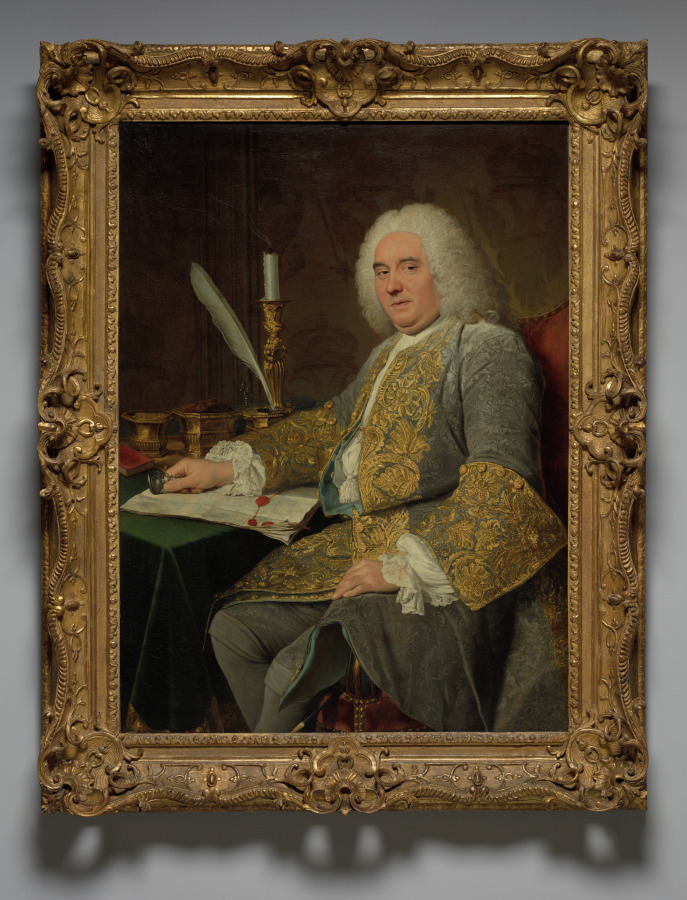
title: Portrait of Jean-Gabriel du Theil at the Signing of the Treaty of Vienna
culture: France, 18th century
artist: Jacques André Joseph Aved (French, 1702–1766)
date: 1738–40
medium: oil on canvas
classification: Painting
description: As secretary of foreign affairs for Louis XV of France, Jean-Gabriel du Theil (1685–1755) helped negotiate the 1738 Treaty of Vienna, which ceded the Duchy of Lorraine to France. The seal du Theil holds in his hand, the silver-gilt writing set, and the thick document all allude to these negotiations, while the wisp of smoke rising from the candle used to melt the sealing wax suggests that the treaty has only just concluded. Du Thiel’s relaxed posture conveys calm assurance, but his sharp gaze is that of a shrewd negotiator. A costume encrusted with gold embroidery and (just visible at his chest) the pink ribbon and star of the royal Order of Saint Lazarus, are visible manifestations of du Theil’s prestigious position.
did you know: Smoke rising from the candle suggests that du Theil has just added his molten wax seal to the document before him.